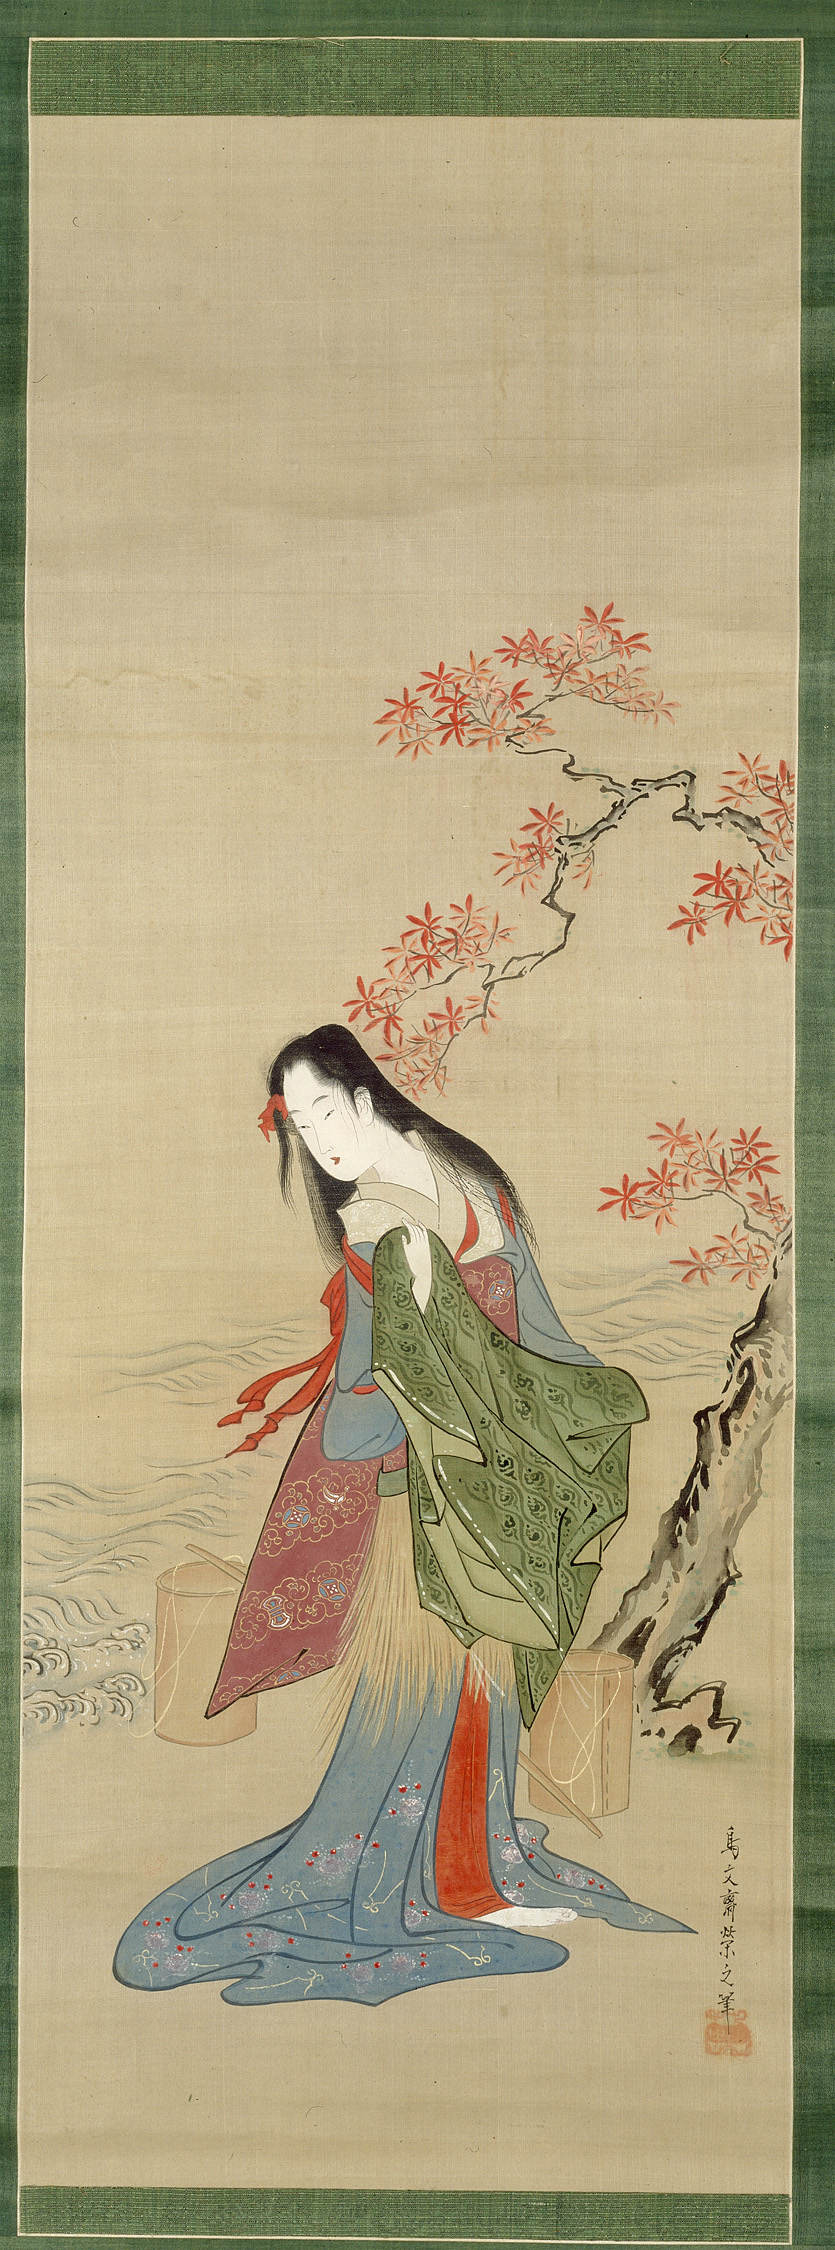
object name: Painting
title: The Salt Maidens, Matsukaze with Yukihira's Coat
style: Japanese (culture or style)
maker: Chôbunsai Eishi (Japanese, 1756-1829)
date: Edo period, c. 1800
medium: Hanging scroll; Ink and colors on silk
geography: Japan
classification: hanging scroll; painting; asian art